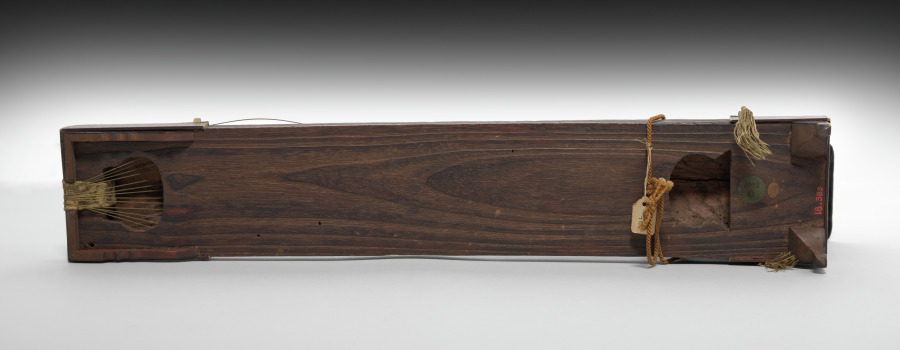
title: Koto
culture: Japan, Edo period (1615–1868)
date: early to mid-1800s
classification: Musical Instrument